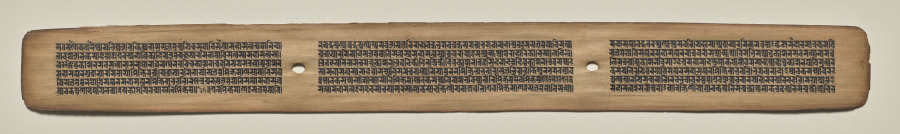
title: Text, Folio 152 (recto), from a Manuscript of the Perfection of Wisdom in Eight Thousand Lines (Ashtasahasrika Prajnaparamita-sutra)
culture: Eastern India, Bihar, Vikramashila Monastery. Painting: Nepal, Kathmandu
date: Sunday, September 14, 1119 (year 239 of the Newar Samvat in the month of Ashvina)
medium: gum tempera and ink on palm leaves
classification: Painting